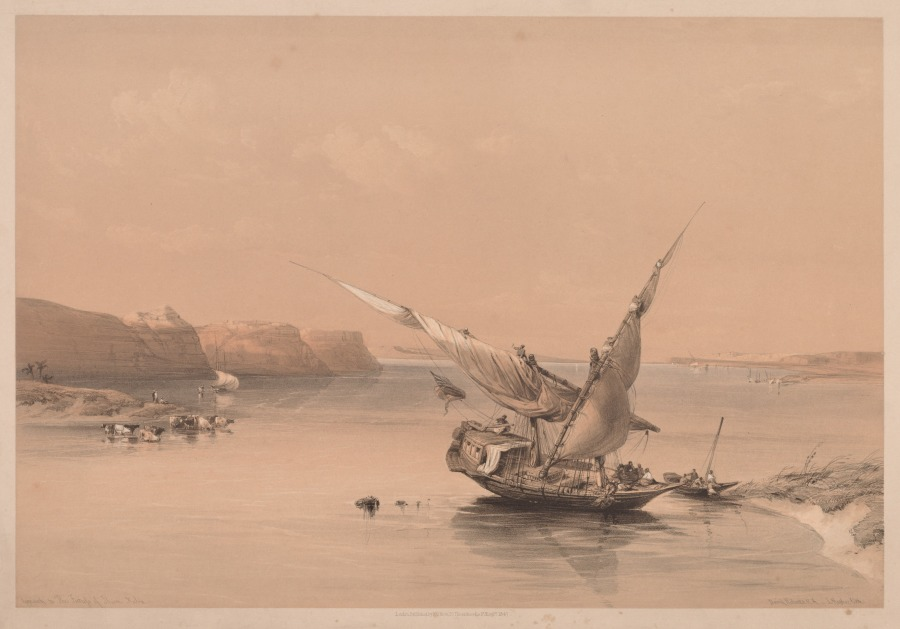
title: Egypt and Nubia: Volume II - No. 6, Approach to the Fortress of Ibrim, Nubia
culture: England, 19th century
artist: Louis Haghe (British, 1806–1885)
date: 1838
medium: color lithograph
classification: Print